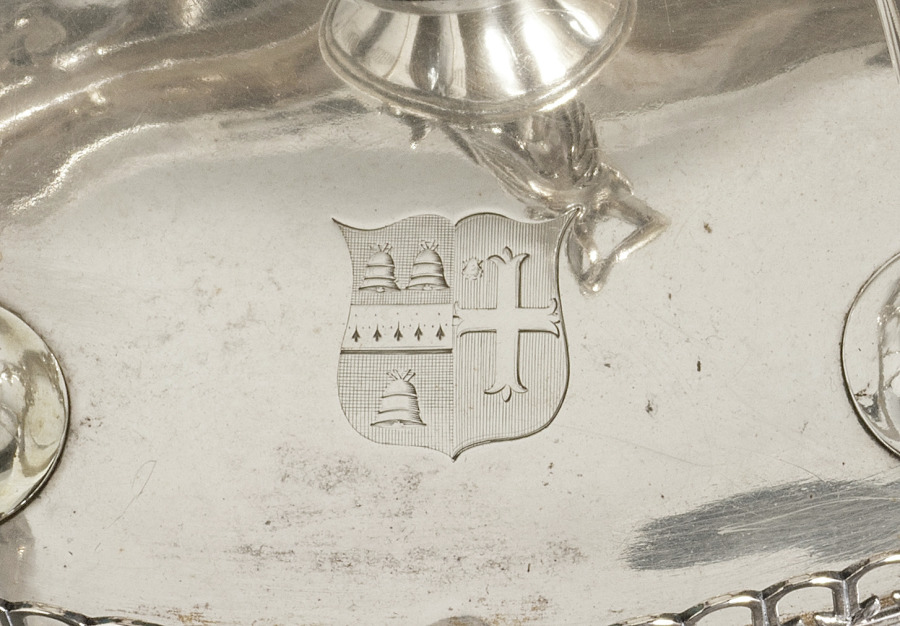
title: Centerpiece (metal stand)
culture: England, 18th century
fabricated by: William Pitts (British)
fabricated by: Joseph Preedy (British)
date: 1792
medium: silver and glass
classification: Silver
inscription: engraved: arms and crest of Bell Coat of arms with Bell impaling Brandling on flat platform.